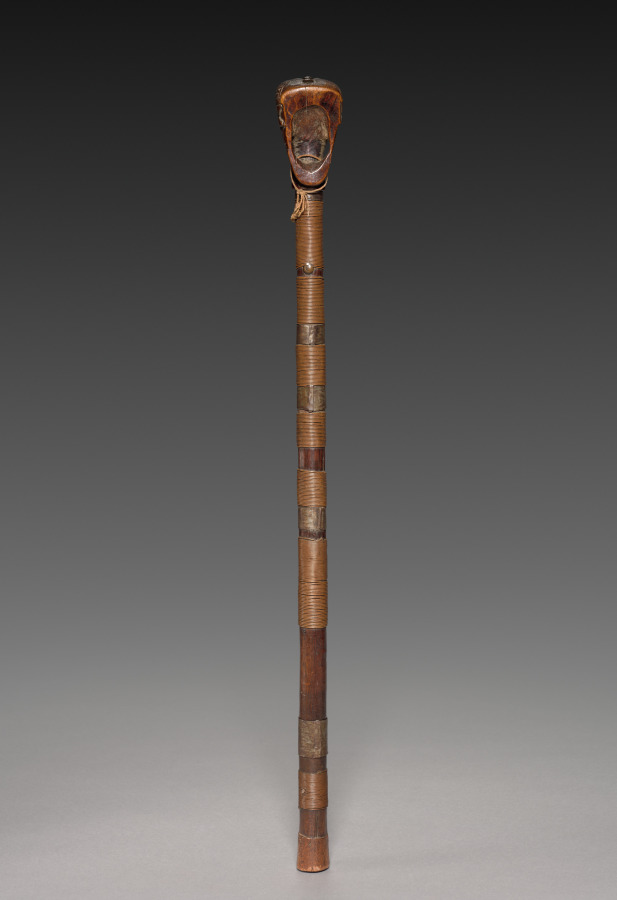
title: Scepter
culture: Africa, Central Africa, Angola, Ovimbundu-style maker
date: late 1800s or early 1900s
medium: Wood, copper alloy, upholstery studs, iron alloy, and cotton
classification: Implements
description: Staffs and scepters as well as tobacco pipes and mortars are among the most important sculptural creations to stem from the Ovimbundu peoples, a Central African culture. All of these object types have associations with ideas of class, status, and power. This scepter has a handle wrapped in thin copper wire that forms wide bands of alternating metal and wooden passages. Its finial is a human head whose carved headdress or hairstyle is ornamented with round-headed metal tacks.